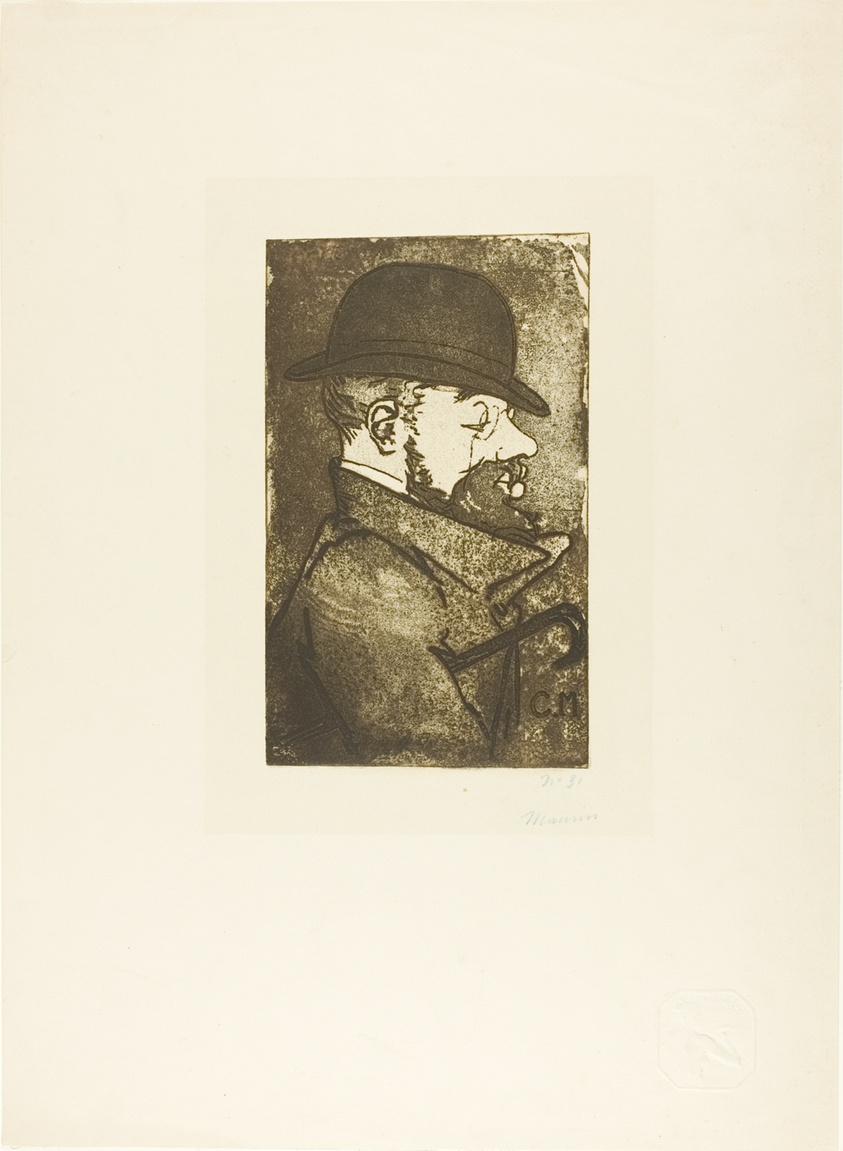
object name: Print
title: Portrait of Toulouse-Lautrec, from the first album of L'Estampe originale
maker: Charles Maurin (French, 1854-1914); printed by Auguste Delâtre (French, 1822-1907); published by L'Estampe originale (French, 1893-1895)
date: 1893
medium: Aquatint and etching in brown on ivory wove paper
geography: France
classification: aquatint; print; prints and drawing